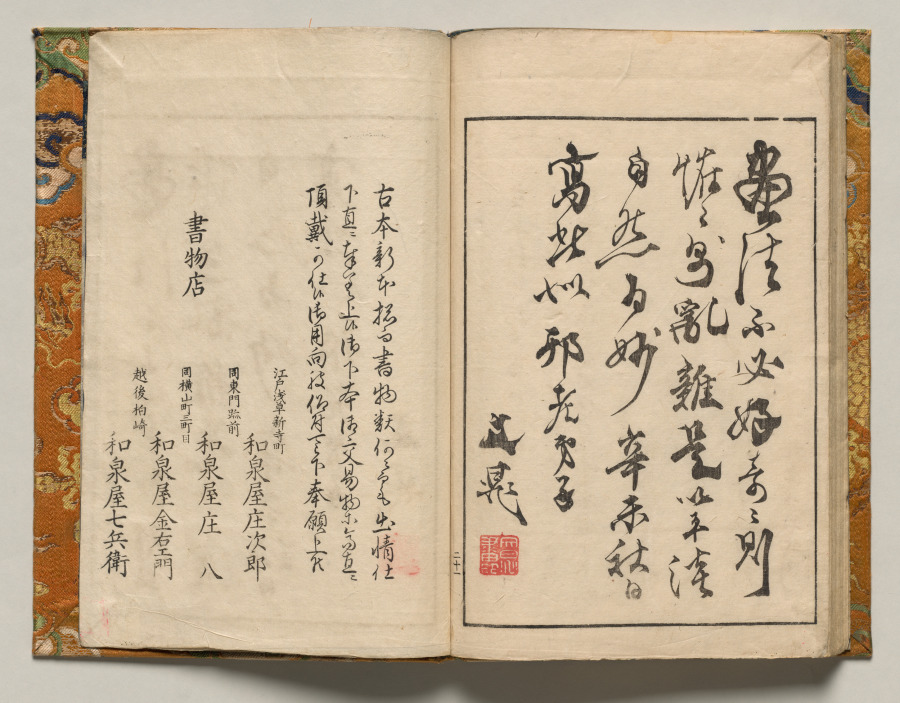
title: Postscript and Publishing Data from Shazanrō Picture Book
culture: Japan, Edo period (1615–1868)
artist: Tani Bunchō (Japanese, 1763–1841)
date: 1816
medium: Woodblock-printed book; ink and color on paper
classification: Bound Volume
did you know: Shazanrō was one of Tani Bunchō's style names.